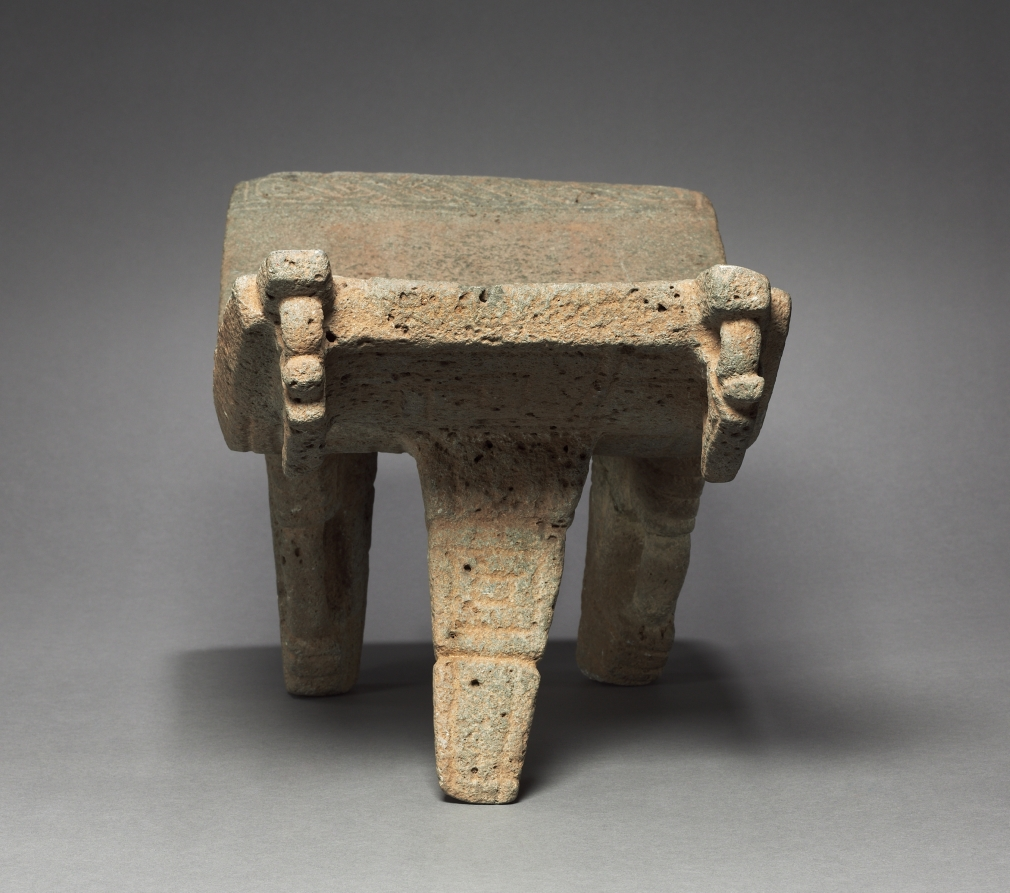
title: Metate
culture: Costa Rica, Guanacaste, northwest coast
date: 1200–1500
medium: gray volcanic stone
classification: Sculpture